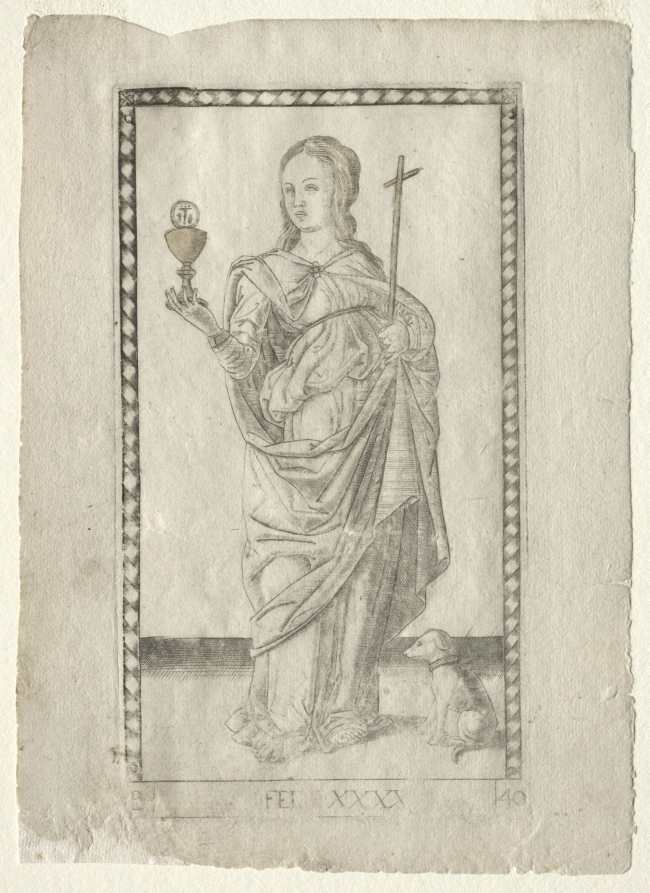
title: Faith (from the Tarocchi, series B: Cosmic Principles & Virtues, #40)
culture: Italy, Ferrara, 15th century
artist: Master of the E-Series Tarocchi (Italian, active 1460s)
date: before 1467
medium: engraving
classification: Print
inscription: Lettered below the image of Fede (Faith): B / FED[E]·XXXX / 40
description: This engraving is part of the group marked with the letter “B”, and named Cosmic Principles and the Virtues, which comprises the three Universal principles (Light, Time, and Space) alongside the four cardinal virtues (Prudence, Temperance, Fortitude and Justice) and the three theological ones (Faith, Hope, and Charity). These latter are a Christian concept originated from a passage in the first Book of Corinthians (1 Corinthians 13:13). Here personified as a full-length female figure, Fede (Faith) firmly holds a cross with her left hand, while she supports the chalice and the host above it with her right hand. The chalice and the host symbolize Christ’s death and the Eucharist—the Christian sacrifice of the Mass—respectively. Sat on the lower right corner is a dog. This animal was regarded as man’s loyal companion, and thus as an allegory of Faith.